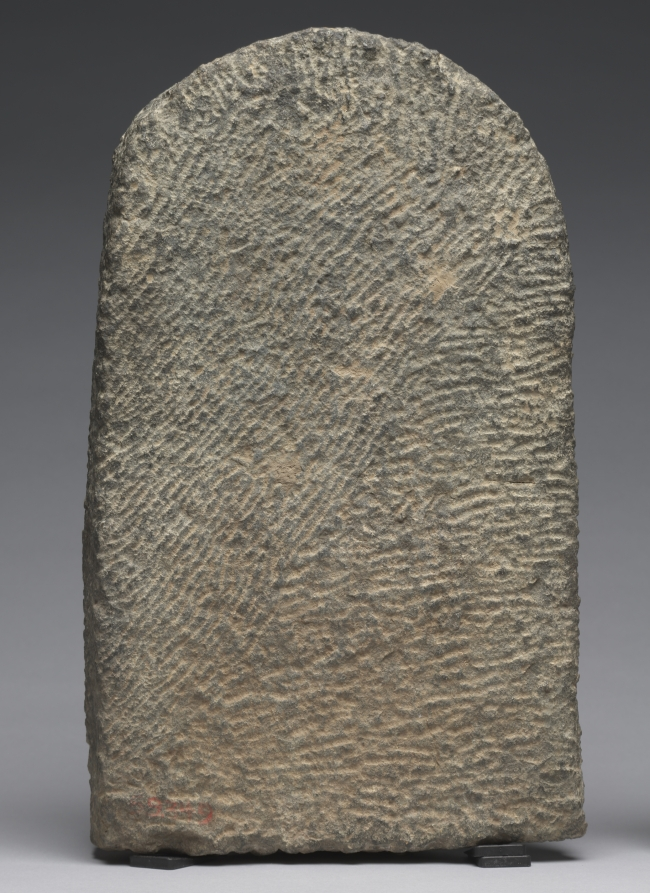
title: Birth of the Buddha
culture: Northeastern India, Bengal, Pala dynasty (730-1197)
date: 800s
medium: Black chlorite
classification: Sculpture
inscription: Phenomena arise from causes;/ The causes have been revealed by the Buddha,/ As have the means for their cessation;/ Thus has been declared by the Great Ascetic.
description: The historical Buddha known as Shakyamuni was born Prince Siddhartha around the end of the 400s BCE near the border of what is today India and Nepal. His mother, Queen Maya, was traveling from her husband’s capital to her family home to give birth, but the baby came early and was born in a grove of shala trees. The miraculous circumstances of his birth are related in a number of textual sources. They state that he emerged from her right side, so Queen Maya here is shown grasping the branch of a tree with her right hand raised, like a nature divinity. The baby was received by Indra, king of the gods, and immediately he took seven steps. The figure at the lower right is Brahma, the Hindu god of creation. In works of Buddhist art, Hindu gods appear as subservient or inferior to the Buddha. The Sanskrit inscription records a common Buddhist prayer of this period: Phenomena arise from causes; The causes have been revealed by the Buddha, As have the means for their cessation; Thus has been declared by the Great Ascetic.